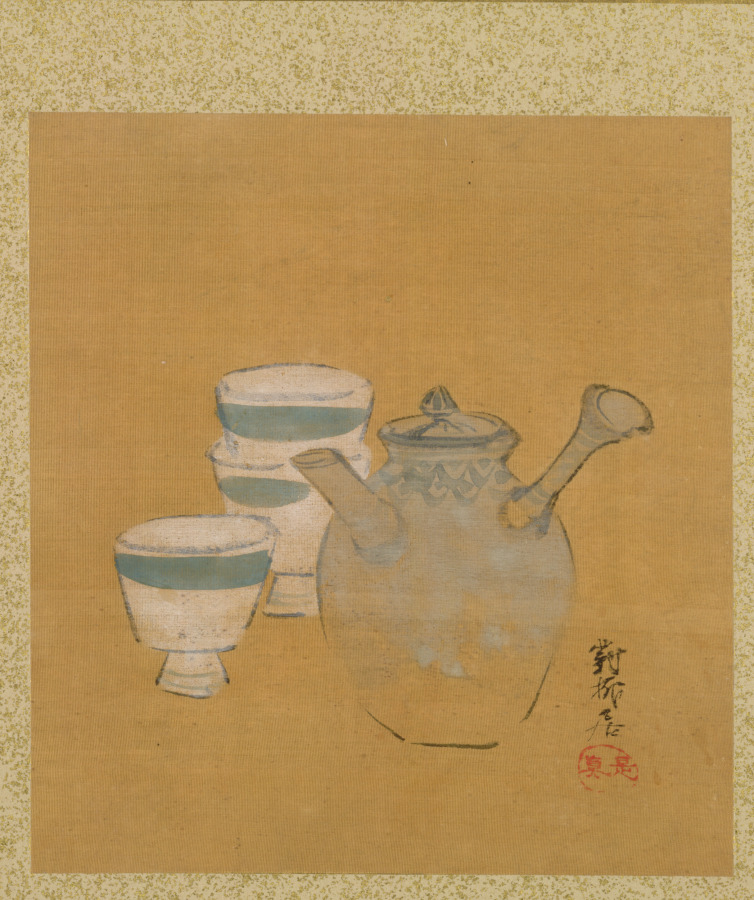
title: Teapot and Cups from Album of Paintings by the Venerable Zeshin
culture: Japan, Edo period (1615–1868)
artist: Shibata Zeshin (Japanese, 1807–1891)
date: 1847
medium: leaf in accordion-style album; ink, color, and gold on silk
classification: Bound Volume